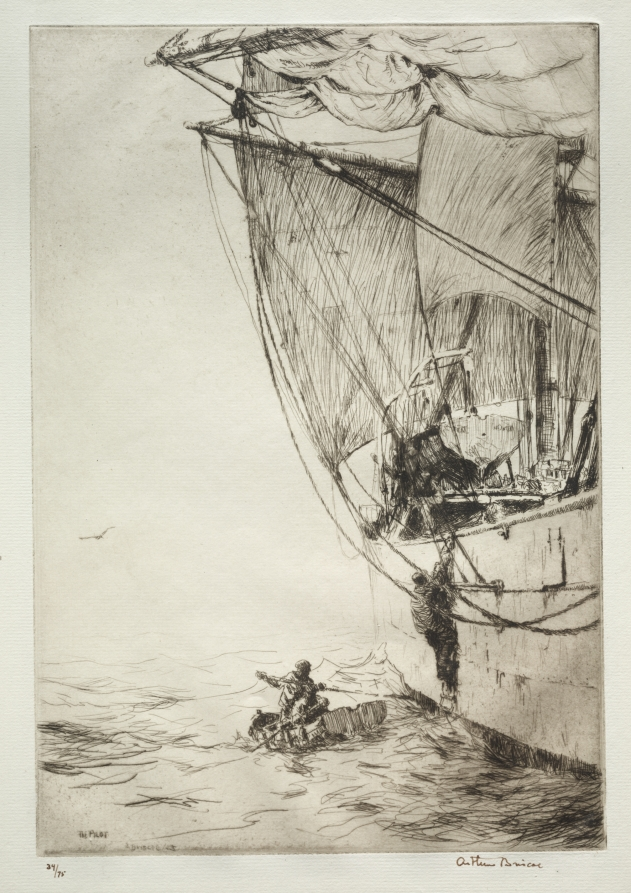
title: The Pilot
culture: England, 20th century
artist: Arthur John Trevor Briscoe (British, 1873–1943)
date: 1925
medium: etching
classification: Print